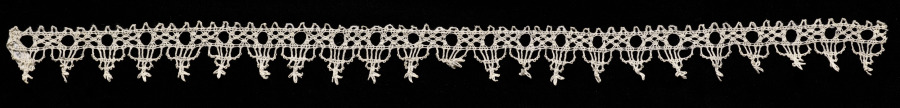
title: Lace Edging of Points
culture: Italy, Venice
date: 1540–60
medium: Bobbin lace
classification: Lace